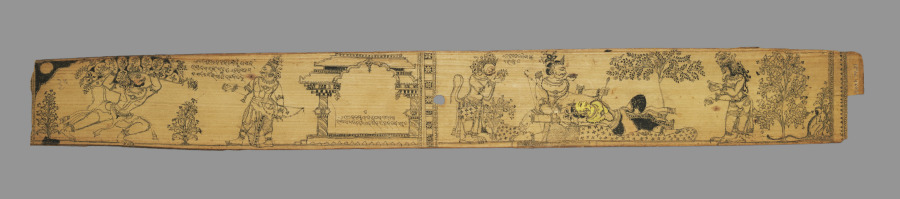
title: Hanuman Brings the Mountain of Healing Plants; Rama Extracts the Arrow from Lakshmana as Hanuman and a Bear Prepare to Treat Him (recto), from a Romance of Chandrabhanu and Lavanyavati of Upendra Bhanja (Indian, died 1740)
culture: Eastern India, Odisha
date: late 1700s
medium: gum tempera and charcoal on palm leaf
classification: Painting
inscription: on both recto and verso in Oriya